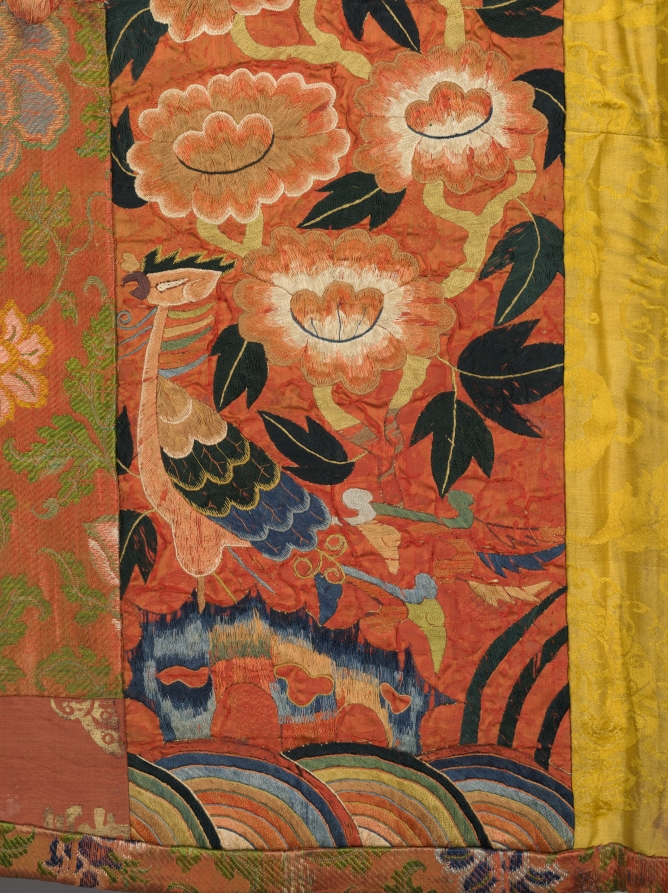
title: Bridal Robe (Hwarot)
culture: Korea, Joseon dynasty (1392–1910)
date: 1850–1910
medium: Satin weave silk; silk embroidery; paper edging on neck and sleeves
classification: Garment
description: This bride's robe is exquisitely embroidered with various symbols of happiness in colorful silk threads. Butterflies stand for marital happiness; the phoenix, numerous offspring; and lotus flowers and white cranes, longevity. Yet, the bridal robe does not attest to the life of luxury. To the contrary, many traces of repairs, trimmings, and patchwork reflect Joseon period women’s commitment to value neo-Confucian aesthetics of frugality and modesty. Substantial repairs and patching reveal that this robe served as an important communal resource to be shared and passed down through several generations. Its collar and sleeves are covered in thick white paper; this paper is replaced with new paper for each bride, while the robe itself was reused for decades.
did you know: This bride's robe was not made for one specific bride, but rather was shared and passed down to many brides.